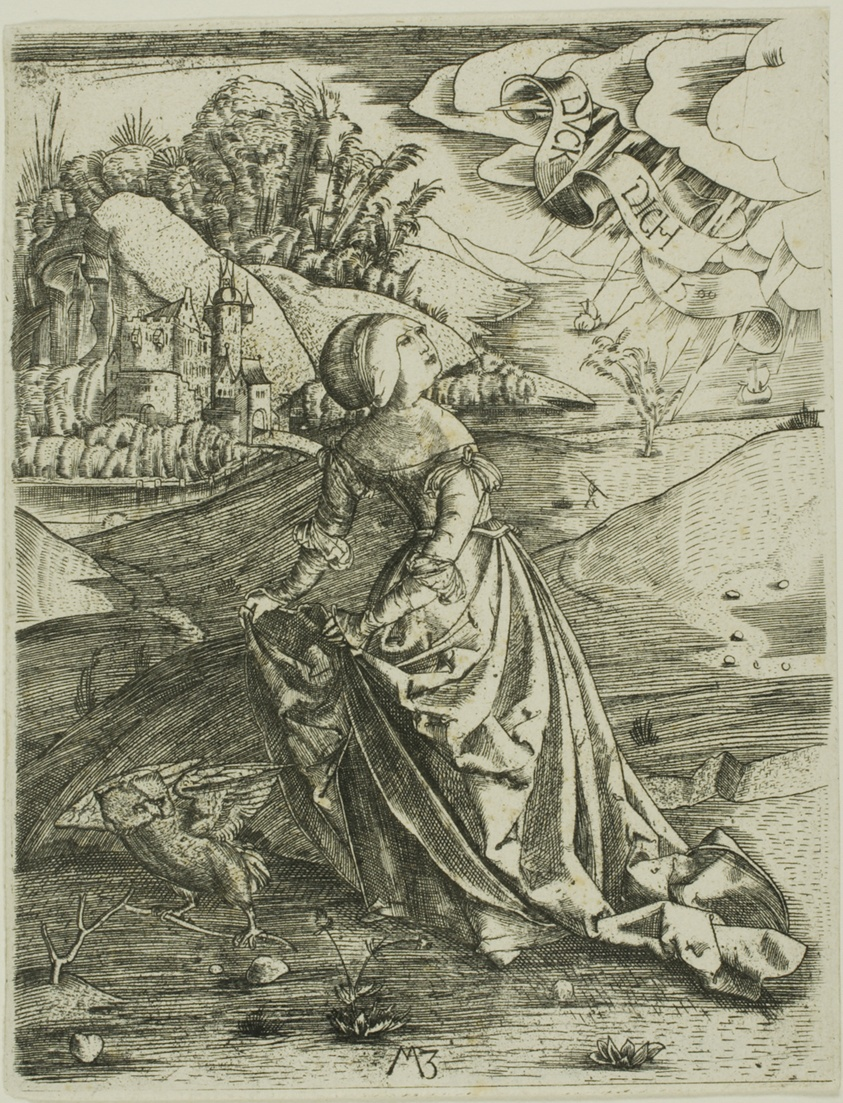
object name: Print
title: The Woman with an Owl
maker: After Master M.Z.; German, active 1500-1550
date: after 1512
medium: Etching in black on ivory laid paper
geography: Germany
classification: engraving; print; prints and drawing